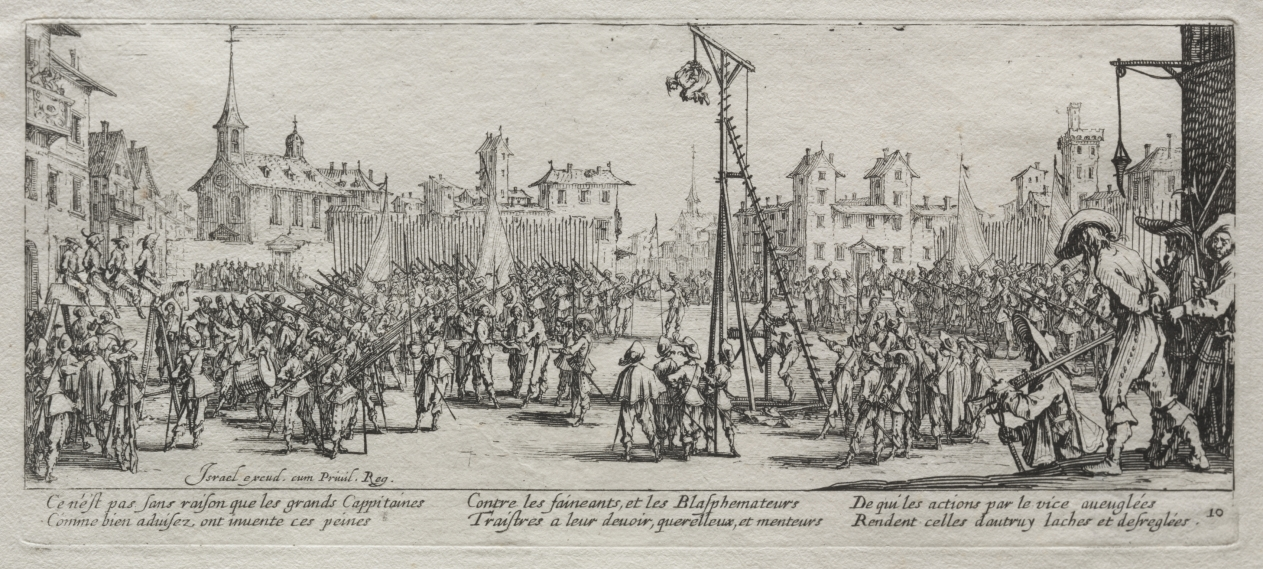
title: The Large Miseries of War: The Strappado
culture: France, 17th century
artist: Jacques Callot (French, 1592–1635)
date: 1633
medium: etching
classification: Print